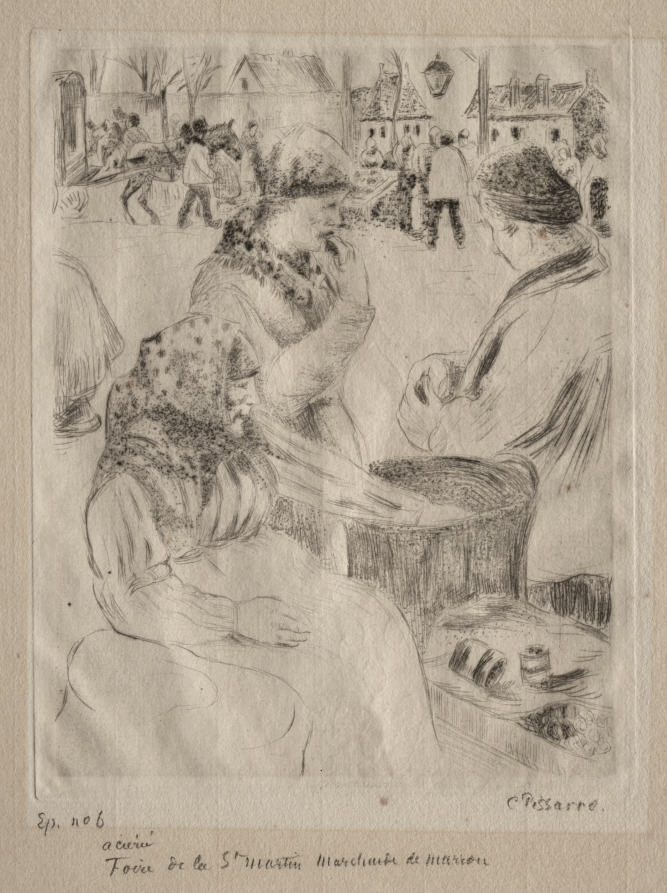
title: Chestnut Vendor, St. Martin's Day Fair (Pontoise)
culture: France, 19th century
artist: Camille Pissarro (French, 1830–1903)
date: 1878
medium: drypoint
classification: Print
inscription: Inscribed, lower left margin, in black: Ep. no 6 aciérée / Foire de la St Martin Marchande de marron; signed, lower right margin, in black: C. Pissarro; inscribed, lower right in black: à Theo van Rysselberghe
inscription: Watermark: [crown over a fleur-de-lys inside a shield] VGZ [Van Gelder Zonen]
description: Pissarro was essentially a landscape artist, and the majority of his prints were landscapes with peasant figures. These images never showed workers exhausted by their labors, for Pissarro was primarily interested in conveying the pleasantness of the countryside and simple, rural life. In this scene of the chestnut vendor, the placing of figures in the foreground reflects the flat design and two-dimensional concept of space characteristic of the Japanese art that was influencing many French artists at the time.